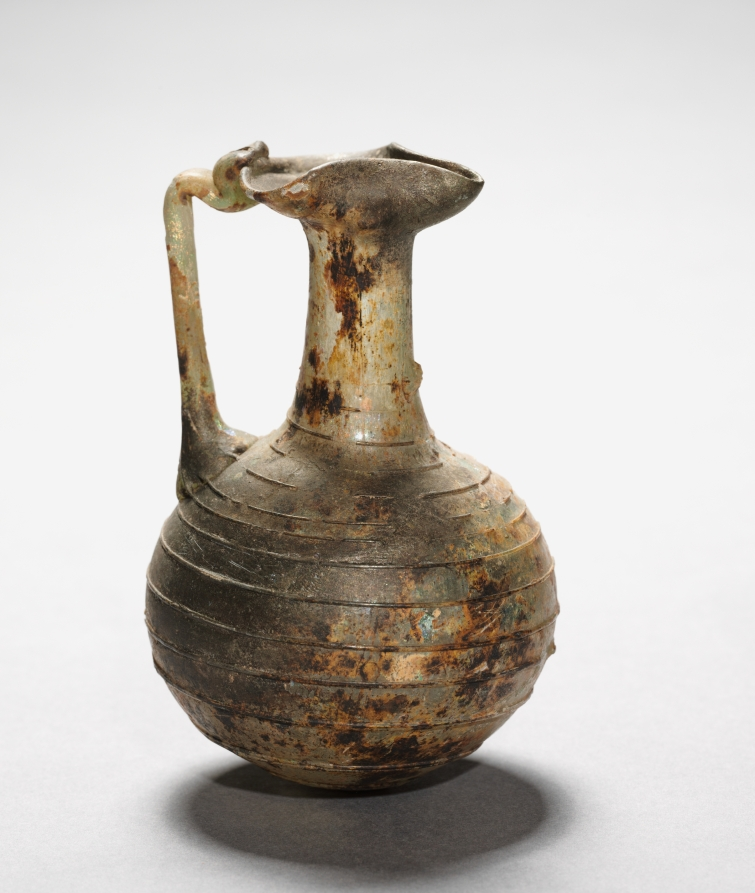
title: Pitcher with Handle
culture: Roman, Eastern Mediterranean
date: 100–400 CE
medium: glass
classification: Glass